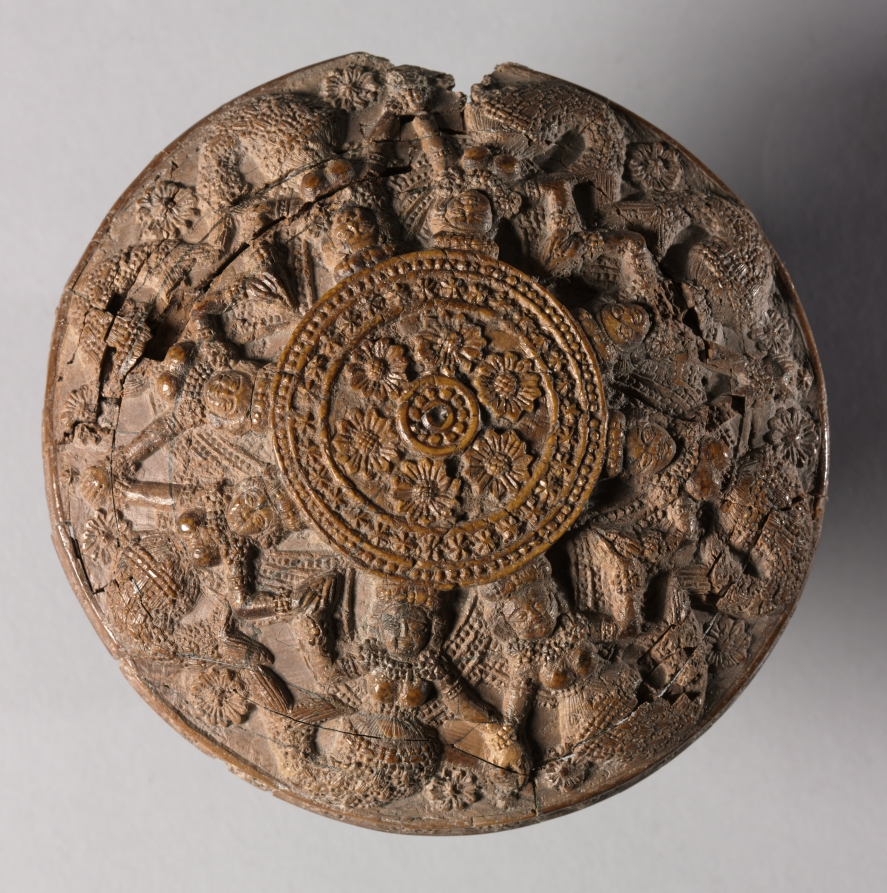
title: Roundel with Mermaids and Lotus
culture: India, Bengal, Chandraketugarh area, Shunga period (185–78 BCE)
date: c. 100 BCE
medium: ivory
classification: Ivory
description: This ivory disk was possibly part of a massive earring around which lobes were stretched so that they rest on the shoulders. Eight figures that are half woman and half fish hold hands in a ring around a series of concentric circles containing floral imagery. Their hands and tails make the repeated form of an auspicious trident-shaped symbol, often depicted with fish tails in combination with a lotus flower. The full-breasted forms, the tails, and the lotus flowers evoke the imagery of life-giving waters. A circle of eight female figures later comes to refer to the maidens of the eight directions of the sky (ashtadikpalikas).